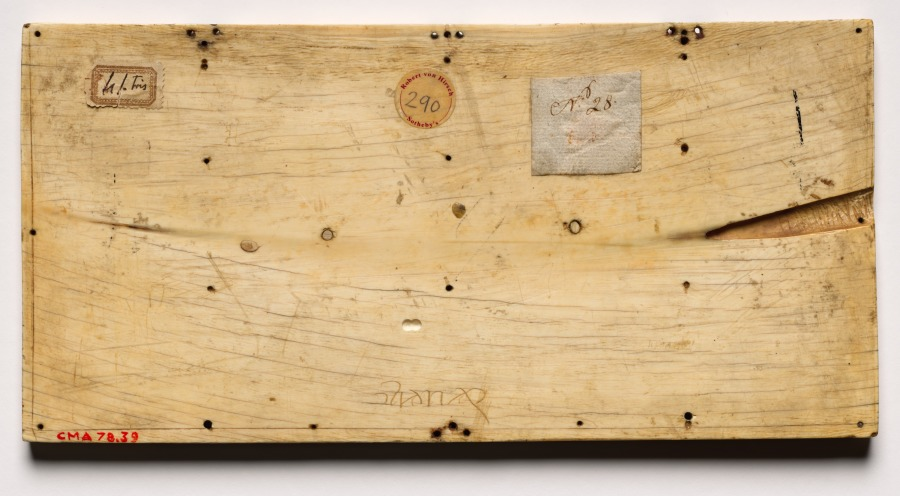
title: Panel from a Casket with Scenes from Courtly Romances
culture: France, Lorraine?, Gothic period, 14th century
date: c. 1330–50 or later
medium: ivory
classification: Ivory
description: Among the most lavish and deluxe products of French ivory workshops of the 1300s were large caskets carved with elaborate scenes drawn from courtly romances. The panel shown here comes from such a casket. The largest panel (here) once formed the lid and depicts a tournament, the most splendid and romantic of knightly activities. Just to the right is a favorite allegory of chivalric love: knights assaulting the castle of love. These images suggesting chivalry, fertility, virginity, youth, and an idealized courtly love likely derive from manuscripts including the Roman de la Rose and the poems of Chrétien de Troyes. Such texts were often found within the libraries of the aristocracy, so the casket’s symbolic images would have been readily understood. Such caskets may have originally been gifts between a man and a woman. The expense of the material, ivory, suggests they were produced for an elite, aristocratic clientele.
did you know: Two knights in mail surcoats and helms joust here with blunted lances "for courtesy," a version of the joust known as the Joust of Peace.